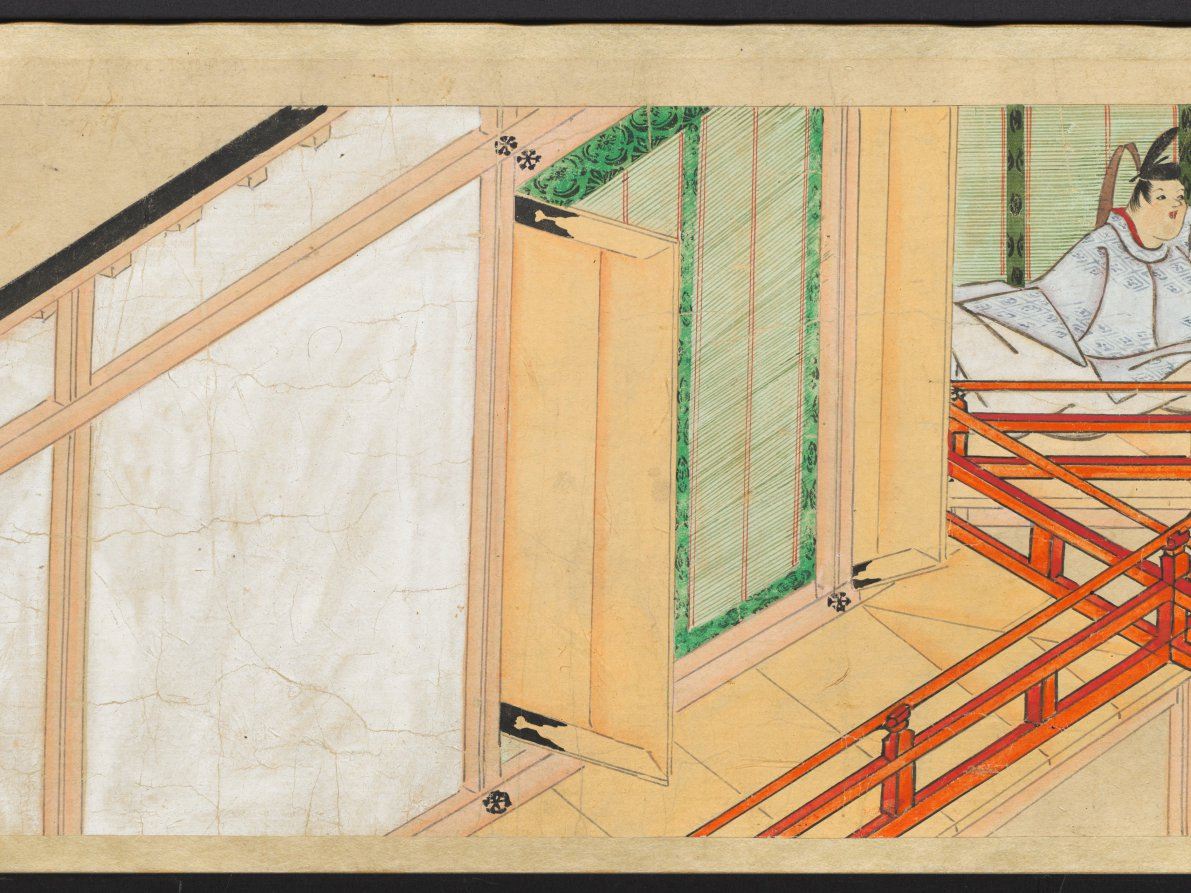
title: The Saltmaker's Story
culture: Japan, Edo period (1615–1868)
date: early 1600s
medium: One of a pair of handscrolls; ink, color, and gold on paper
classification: Painting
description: Once read and copied by girls at New Year’s celebrations and included in dowries, The Saltmaker’s Story is a rags-to-riches tale in which daughters are gifts from the gods. Despite his simple outlook, the main character progresses from humble roots as an associate at Kashima Shrine to the elite status of grandfather of the emperor through the intervention of the Kashima deity. The Saltmaker’s Story is traditionally presented in a set of three scrolls, but the text of this set has been removed by a previous owner, who remounted the illustrations as a pair. The paintings of this one take us from right to left through the second half of the tale.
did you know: This handscroll originally had texts before its paintings, but the texts were removed.